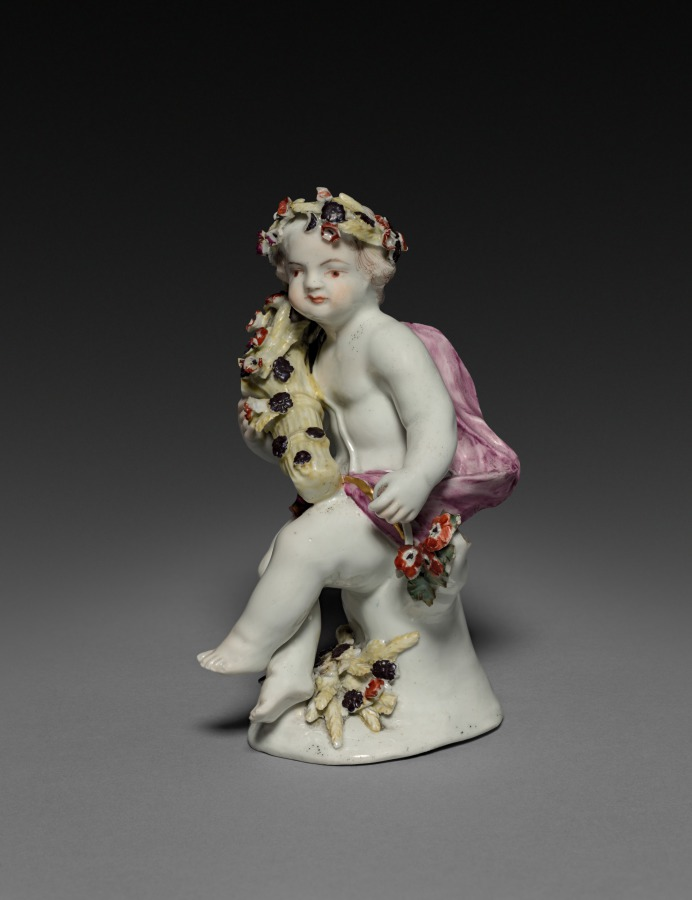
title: Summer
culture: England, Derby, 18th century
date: c. 1760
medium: soft-paste porcelain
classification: Ceramic